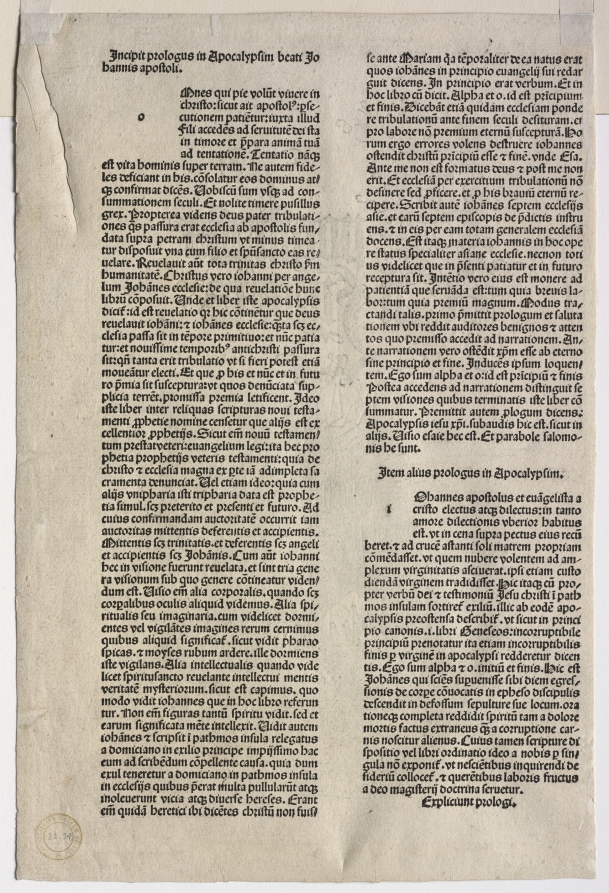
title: Revelation of St. John: Title Page to the Apocalypse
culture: Germany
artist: Albrecht Dürer (German, 1471–1528)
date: 1511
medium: woodcut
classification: Print